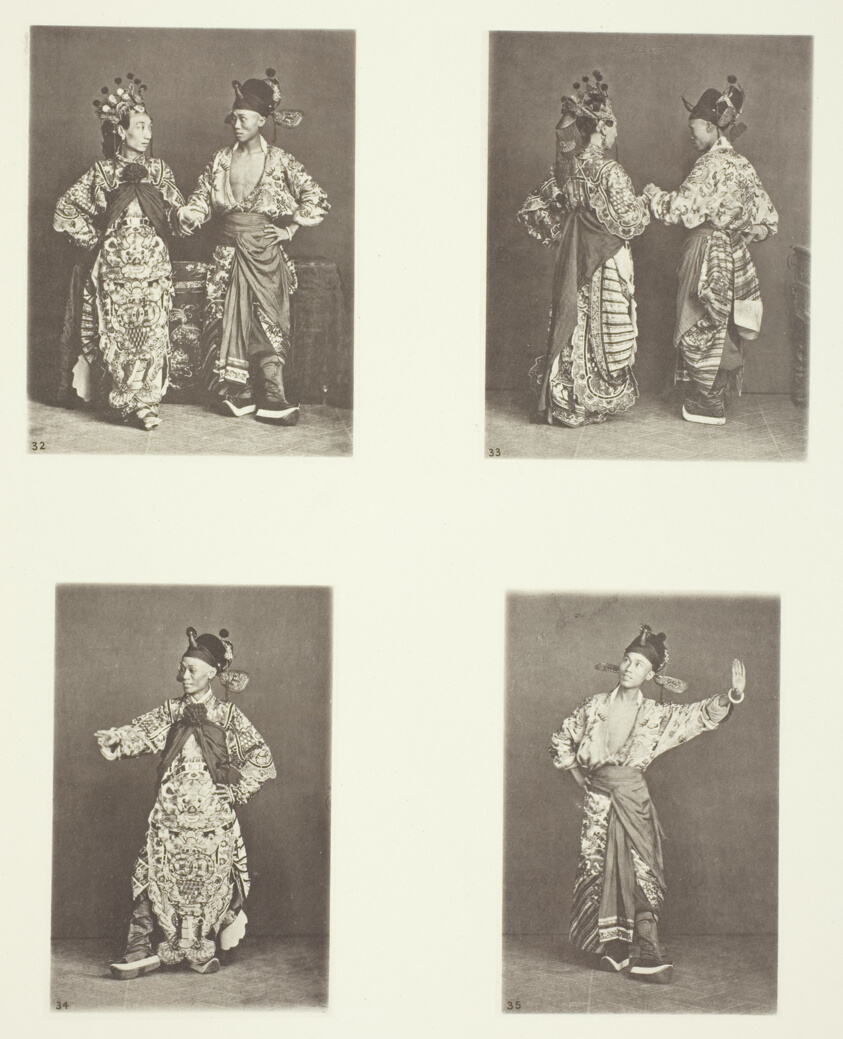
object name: Photograph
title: Actors, Ancient Marriage Costume; Actors, Ancient Marriage Costume; Ancient Costumes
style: 19th century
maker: John Thomson (Scottish, 1837–1921)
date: c. 1868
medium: Collotype, pl. XI from the album "Illustrations of China and its People, Volume II" (1873)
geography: Scotland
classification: photography; photograph